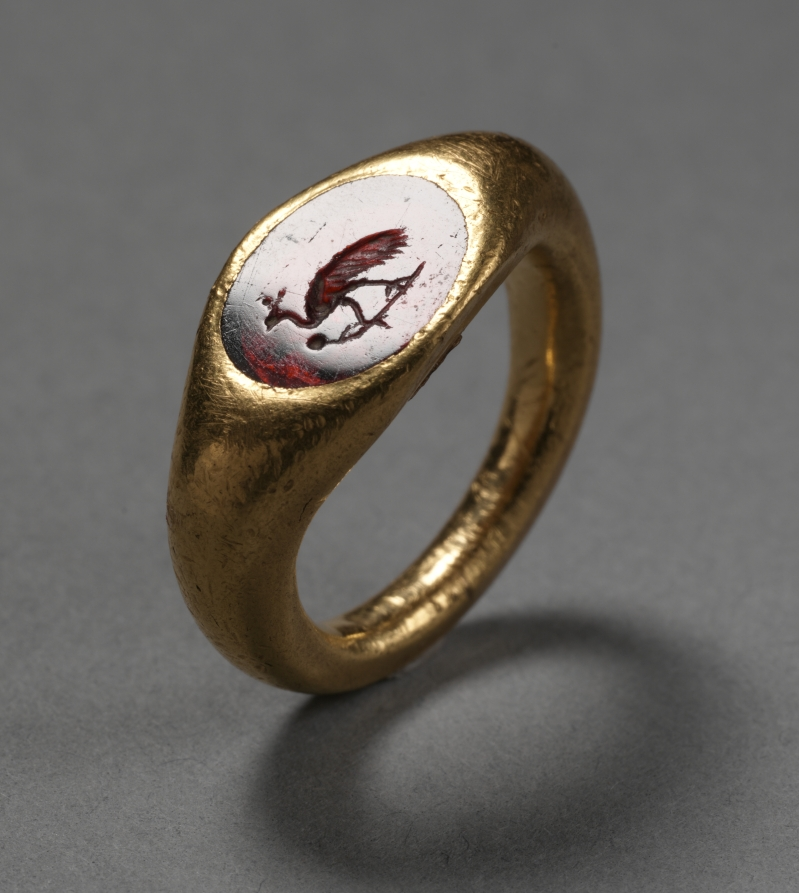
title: Peacock Ring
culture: Seleucia, Parthian Empire (247 BCE–224 CE)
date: 1–200 CE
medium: gold and chalcedony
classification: Jewelry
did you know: Made of gold inset with chalcedony, a type of quartz, this simple yet elegant signet ring has timeless appeal. A skilled artisan carved a peacock into the oval stone creating an emblem that would have had personal meaning for the owner.